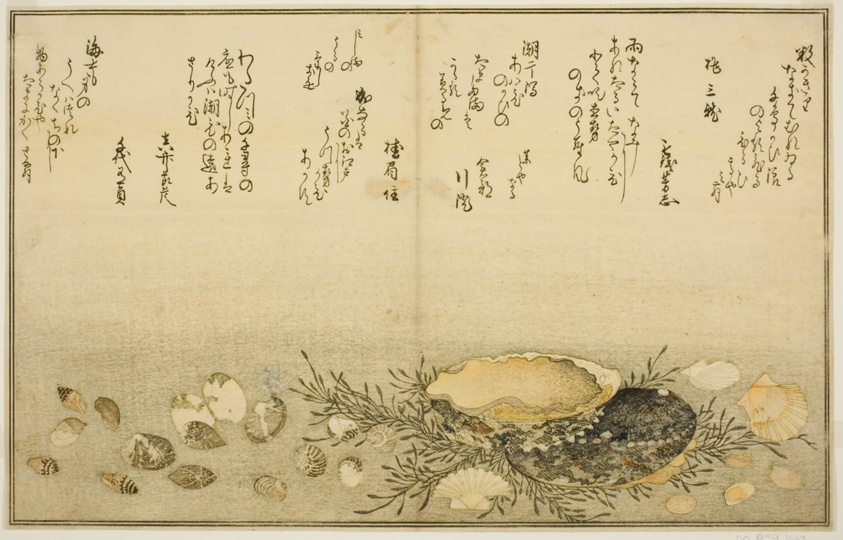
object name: Print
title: Chidori-gai, itaya-gai, awabi, utsuse-gai, asari-gai, and monoara-gai, from the illustrated book "Gifts from the Ebb Tide (Shiohi no tsuto)"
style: Japanese (culture or style)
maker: Kitagawa Utamaro 喜多川 歌麿; Japanese, 1753 (?)-1806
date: 1789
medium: Color woodblock print; double-page illustration from book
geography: Japan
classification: woodblock print; print; asian art